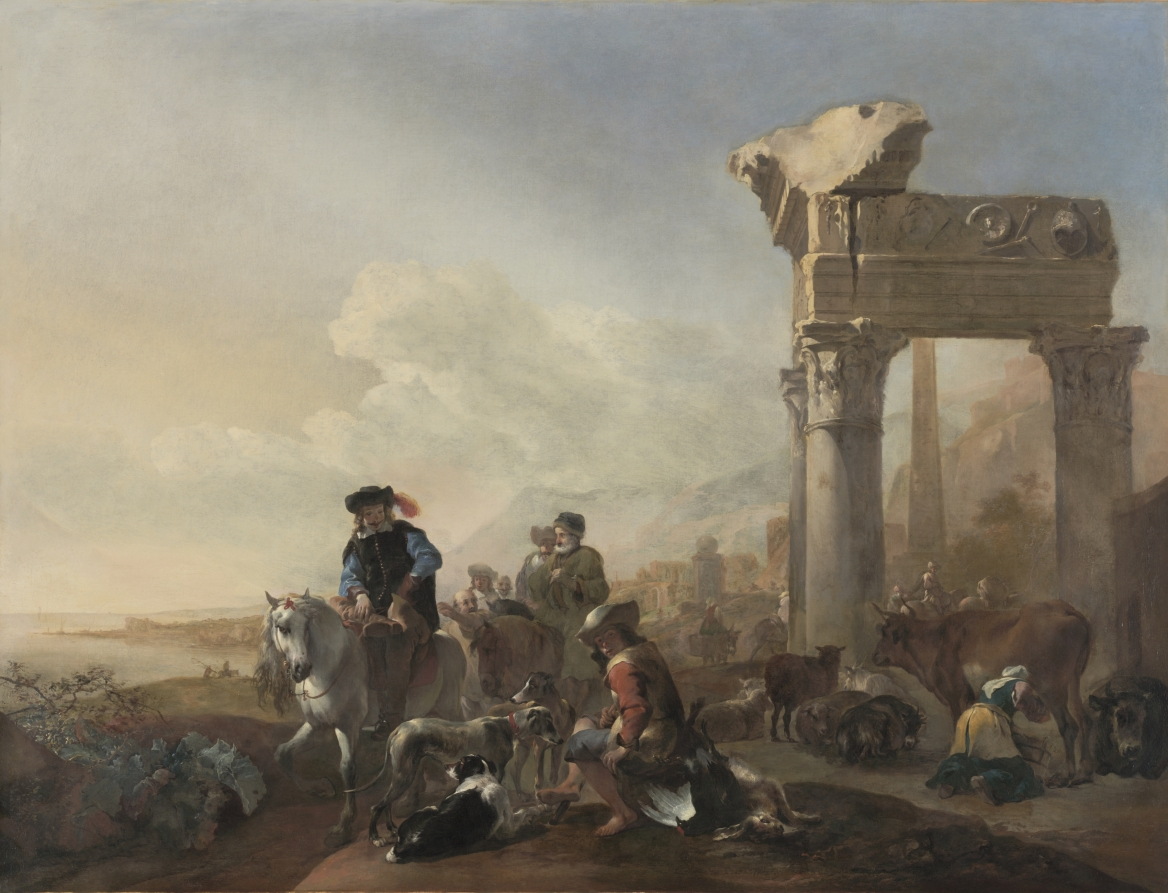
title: Hunters Near Ruins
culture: Netherlands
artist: Jan Baptist Weenix (Dutch, 1621–1660)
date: 1648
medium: oil on canvas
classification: Painting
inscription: Signed lower right: Gio. Batta. Weenix: 1648"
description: Weenix lived in Rome for five years and painted Italianate landscapes, rather than local, Dutch subjects. The bright light, classical architecture, and exotic-looking garb of the figures all speak to this interest in foreign landscape.